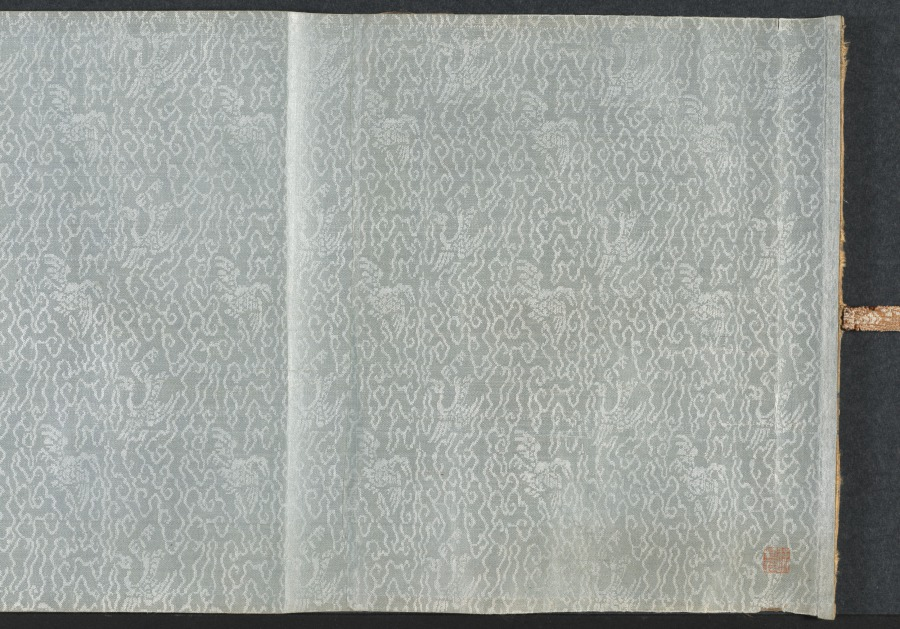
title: Nine Songs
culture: China, Yuan dynasty (1271-1368)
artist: Zhang Wo (Chinese, active c.1336–after 1364)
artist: Chu Huan (Chinese, active 1361)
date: 1361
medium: handscroll; ink on paper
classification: Painting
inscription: 7 colophons and 47 seals: 1 colophon, dated 1361, and 28 seals of Chu Huan 褚奐 (active c. 1361); 1 colophon, dated 1785, and 1 seal of Lu Shihua 陸時化 (1714-1779); 2 seals of Lu Yü-ch'ing (18th c.); 1 colophon, dated 1935, of Ye Gongchuo 葉恭綽 (1881-1968); 1 colophon, dated 1935, of Wu Hufan 吳湖帆(1894–1968); 1 colophon, dated 1938, and 1 seal of Wang Tongyu 王同愈 (1856-1941); 1 colophon, dated 1941, of Wu Huayuan 吳華源 (1893-1972); 1 colophon, dated 1942, and 9 seals of Xu Bangda 徐邦達 (1911–2012); 1 colophon, dated 1942, of Lang Jingshan 郎靜山 (1892-1995); 1 colophon, dated 1944, of Tang Yun 唐雲 (1910-1993); 6 seals of Wang Jiqian [C.C. Wang] 王季遷 (1907–2003).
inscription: Text of The Nine Songs written by Chu Huan at the end of each section.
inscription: 右離騷九歌圖，宋龍溟居士李公本，淮南張渥叔厚所畫妙絕當世。家藏請予書其辭目識于左。至正二十一年辛醜三月旦河南褚奐記。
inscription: Colophon by Lu Shihua 陸時化 (1714–1789): This scroll is fortunate to have been handed down from collections of the right people. Now, after 500 years, its condition is as good as when it was painted. I acquired this from Mr. Shen Guiyu [1673-1769], the President of the Board of Rites. The label is in his handwriting when he was 95 years old. I submit that Chu Huan (t. Shiwen) of the Yuan Dynasty was a native of Qiantang. His "seal" and li writings are in the style of Wu Rui. For example, in [Chu Kuei's] Ming ji lu [A list of masterpieces] is recorded the stele commemorating the restoration of the prefectural school of Kun-shan, the text of which was composed by Yang Weizhen in the twenty-first year of Zhizheng [1361]; and the calligraphy as well as the title in li style was by Chu Huan, who was at that time an assistant judge of the prefecture of Haining in the circuit of Hangzhou. Zhang Wo's zi is Shuhou (叔厚). His literary name is Zhen Qisheng (贞期生). According to [Gu Ying's] Yu shan cao tang ya jii, he liked to paint in the bai-miao or the "pure delineation" style after the method of Li Longmian [Li Gonglin 李公麟], which finds no peer among the ancient masters. This is agreed upon [by Pei Ch'iung] in his Qing jiang zhi who praised [Zhang Wo] as being quite learned and well-versed in many branches of the arts, especially figure painting. Recorded by Lu Shihua [The mountain dweller], listening to the pine, in the twelfth month of the yisi year [1785].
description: Painted in the baimiao, or fine-line drawing style, this ancient work demonstrates the literati’s use of abstract calligraphic brushwork for self-expression. The subject of the “Nine Songs”—songs associated with shamanistic rituals in the ancient Chu kingdom—had traditionally provided artists with myths and legends that they could explore and reinterpret in their own works.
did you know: Divided into eleven sections, the scroll contains illustrations by painter Zhang Wu followed by a transcription of the relevant verse by calligrapher Chu Huan.